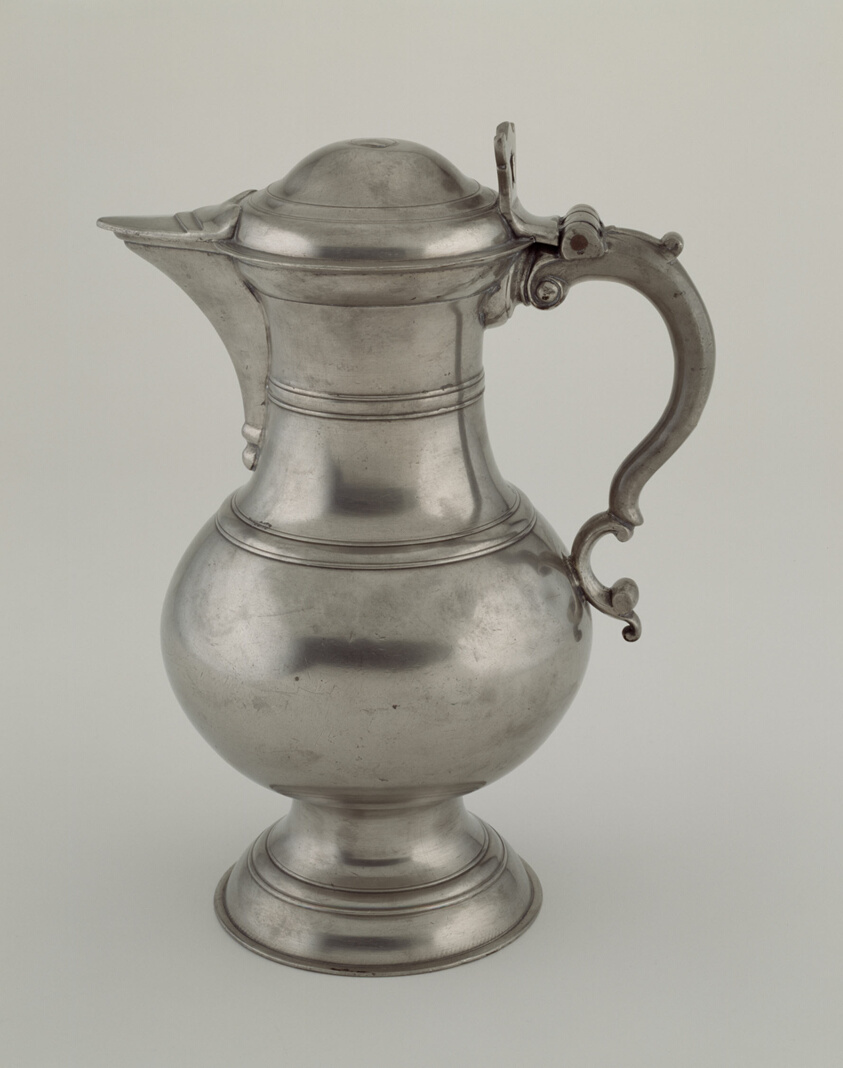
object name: Decorative Arts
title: Flagon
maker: Attributed to William Will; American, born Germany, 1742–1798; Philadelphia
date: 1765–80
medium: Pewter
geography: Philadelphia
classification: vessel for serving drinks; metalwork; american decorative arts; american arts; decorative arts